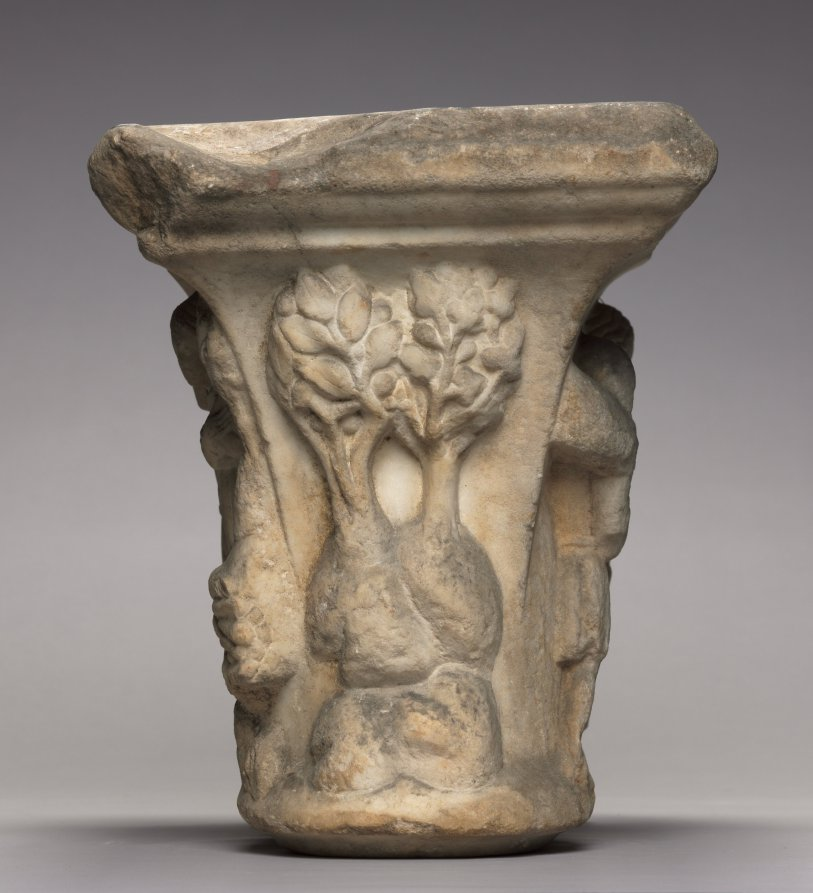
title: Engaged Capital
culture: Southern France, Abbey of Larreule, near Tarbes, 15th century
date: 1400s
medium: limestone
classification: Sculpture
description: This capital belongs to a surviving group including other architectural fragments that once decorated the cloister of the Abbey of Larreule. A cloister was a covered walkway or arcade, usually around all four sides of a square area of grass (the "cloister garth"). The seclusion of the cloister was the monks’ exclusive domain, off limits to others. Here, the monks were supposed to pray, study, meditate, and exercise in privacy and solitude. Such cloister capitals served both to instruct the monks and as a focus for their devotions. Other capitals in this series are installed in the Jardin Massey at Tarbes, near the original abbey. An arch from Larreule has been assembled with other associated French capitals at The Cloisters in New York.